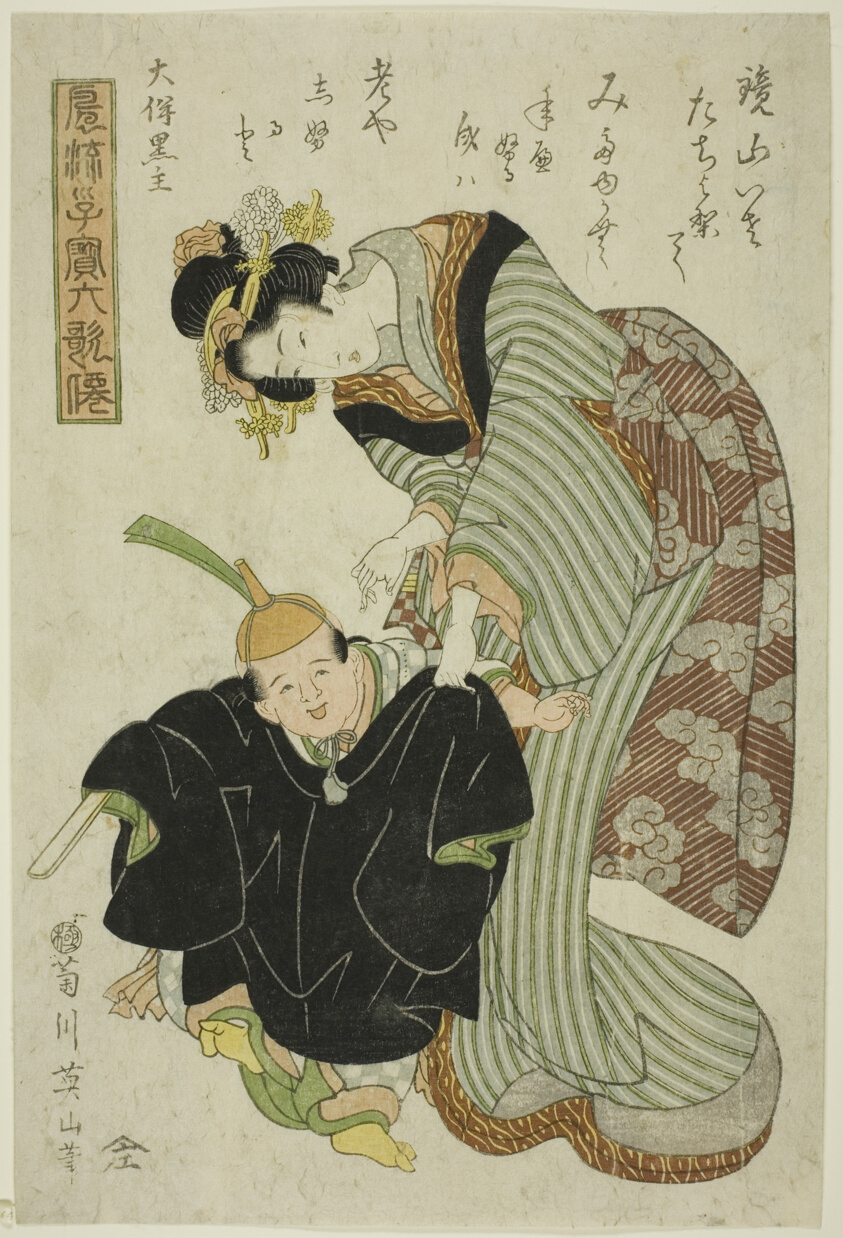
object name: Print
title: Otomo no Kuronushi, from the series "Fashionable Children as the Six Immortal Poets (Furyu kodakara rokkasen)"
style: Japanese (culture or style)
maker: Kikukawa Eizan (Japanese, 1787-1867)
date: c. 1814/17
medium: Color woodblock print; oban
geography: Japan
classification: woodblock print; print; asian art